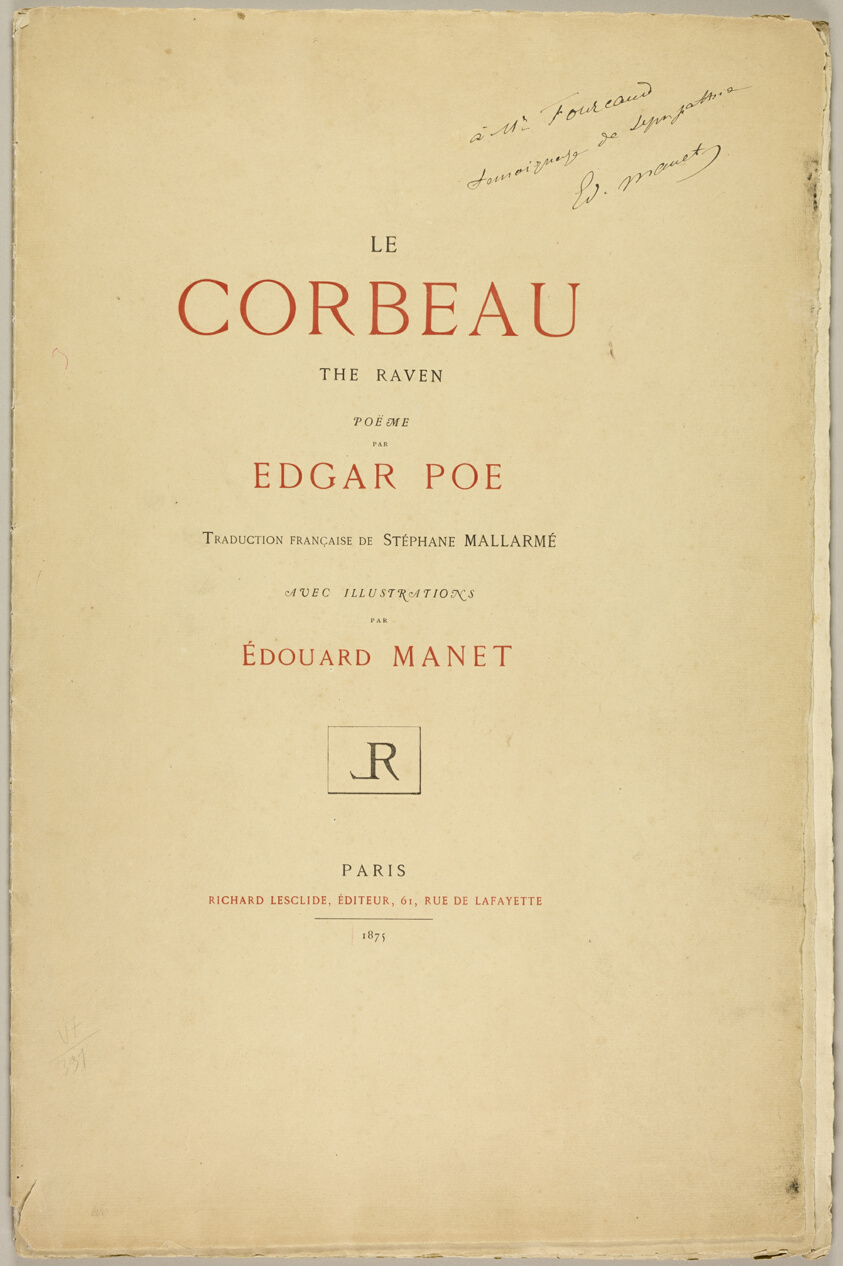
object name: Book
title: Title Page and Text, from The Raven (Le Corbeau)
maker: Édouard Manet (French, 1832-1883); written by Edgar Allan Poe (American, 1809-1849); translated and produced by Stéphane Mallarmé (French, 1842-1898); printed by Lefman et Cie. (French, 19th century); text printed by Alcan-Lévy (French, 19th century); published by Richard Lesclide (French, 1825-1892)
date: 1875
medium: Unbound book, three folded sheets, with letterpress in red and black on cream laid paper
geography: France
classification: book; prints and drawing